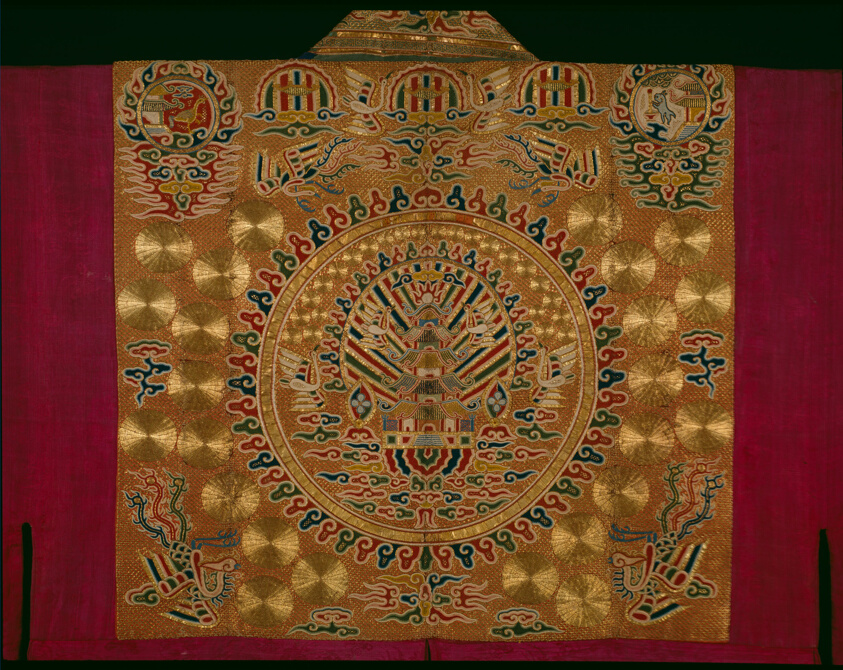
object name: Costume and Accessories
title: Vestment (For a Second-degree Taoist Priest)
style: qing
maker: Han-Chinese (China)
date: Qing dynasty (1644–1911), 1801/50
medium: Silk, warp-float faced 3:1 'S' twill weave self-patterned by areas of plain weave; edge bands and center back: silk, warp-float faced 7:1 satin weave; embroidered with silk, gold-leaf-over-lacquered paper, and gold-leaf-over-lacquered-paper-strip-wrapped silk in satin and knot stitches; laid work and couching; inner collar and closures: silk, weft-float faced 1:7 satin weave; collar patches: silk, warp-float faced 7:1 satin weave; lined with ramie, plain weave; lining fragments: silk, warp-float faced 4:1 satin weave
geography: China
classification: textile; needlework (visual works); weaving; costume